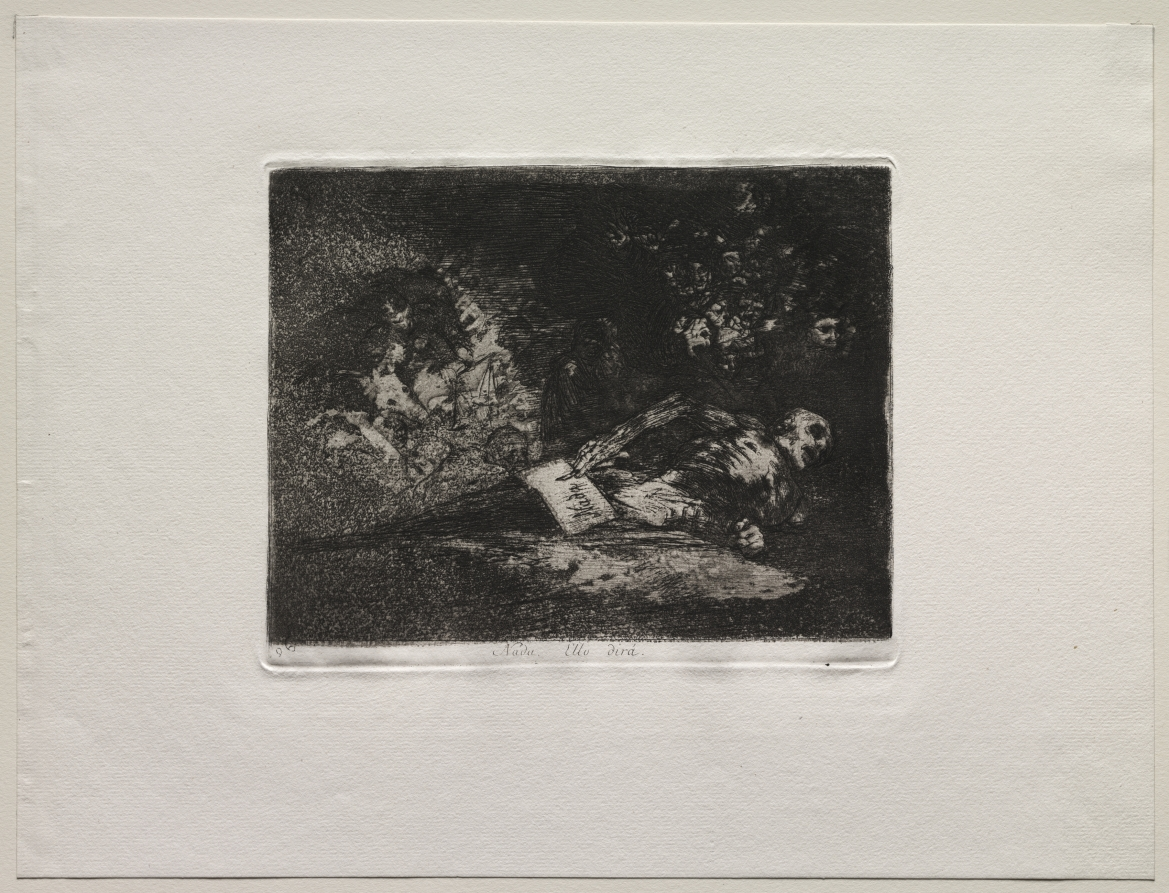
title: The Horrors of War: Nothing. The Event Will Tell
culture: Spain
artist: Francisco de Goya (Spanish, 1746–1828)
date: c. 1810–20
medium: etching and aquatint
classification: Print